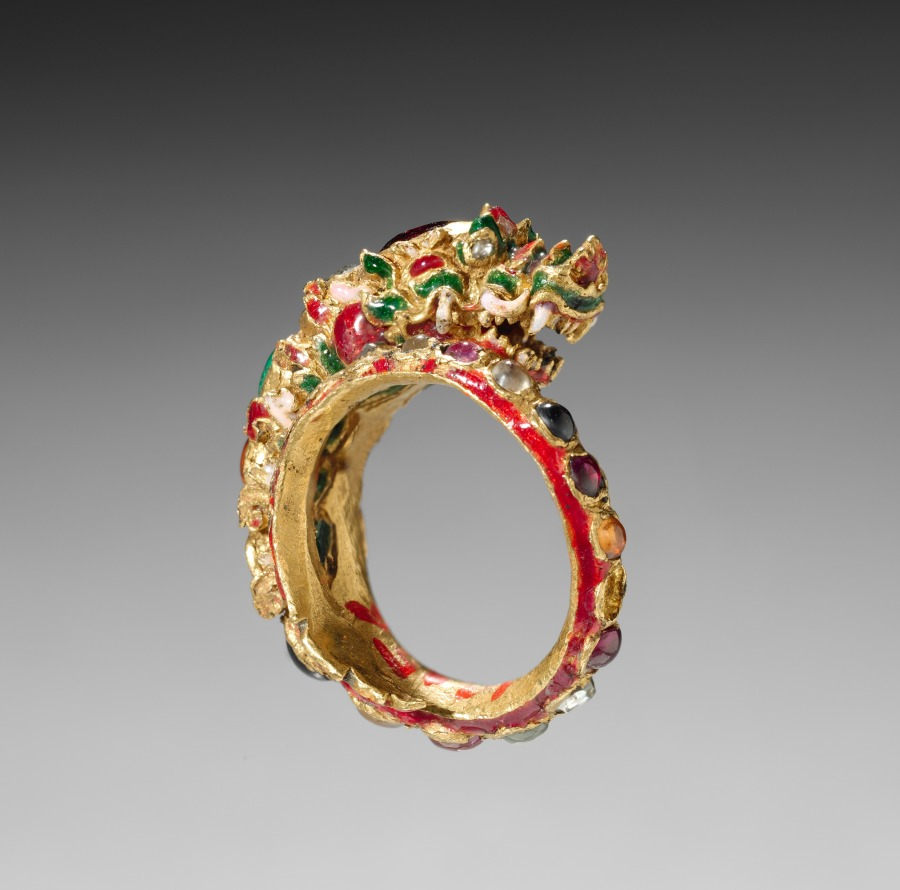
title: Ring in the Form of a Dragon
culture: India (?), Burma (?), Malay (?)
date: 18th Century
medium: gold, enamel and gems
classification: Jewelry